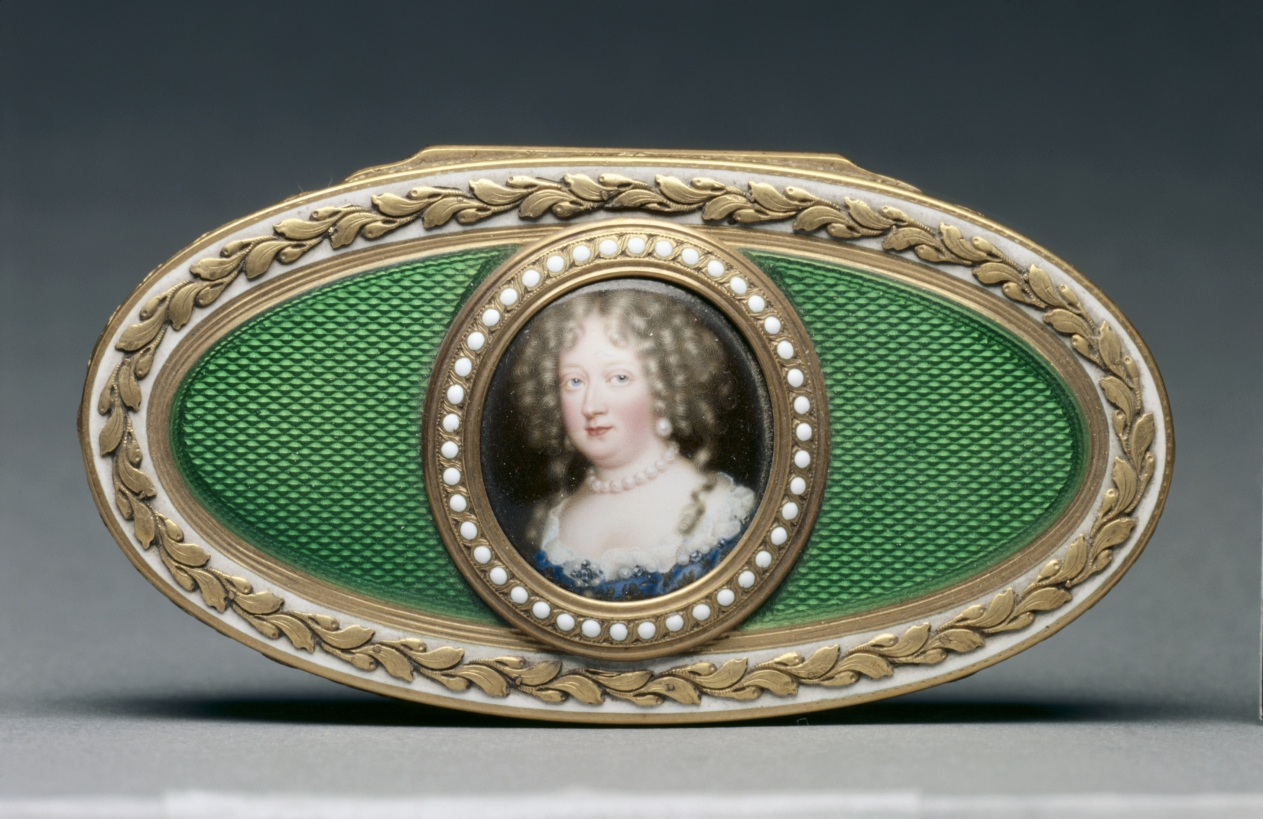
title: Snuff Box (Tabatière) with Portrait of Marie-Thérèse of Austria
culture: France, 18th century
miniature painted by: Jean Petitot (Swiss, 1607–1691)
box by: Charles Le Bastier (French)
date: miniature, c. 1676; box, 1775–76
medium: Gold, enamel, and miniature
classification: Enamel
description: In 18th-century France, ornately enameled boxes that held snuff—powdered tobacco—became a popular accessory in the French court. This box is decorated with a miniature portrait of Marie-Thérèse of Austria, the queen consort of French King Louis XIV. Their union was largely political. A year into their marriage Louis XIV took an official mistress, Madame Pompadour.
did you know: This box resulted from the combined efforts of the popular portrait painter who served the court of French King Louis XIV, Jean Petitot, and master goldsmith Charles Le Bastier.